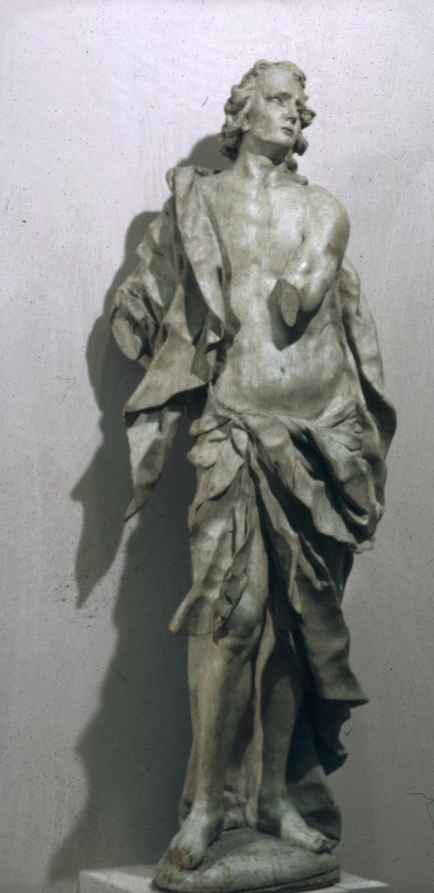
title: A Saint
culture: Germany or Austria, 18th century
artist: follower of Diego Francesco Carlone (Italian, 1674–1750)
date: c. 1730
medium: wood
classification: Sculpture